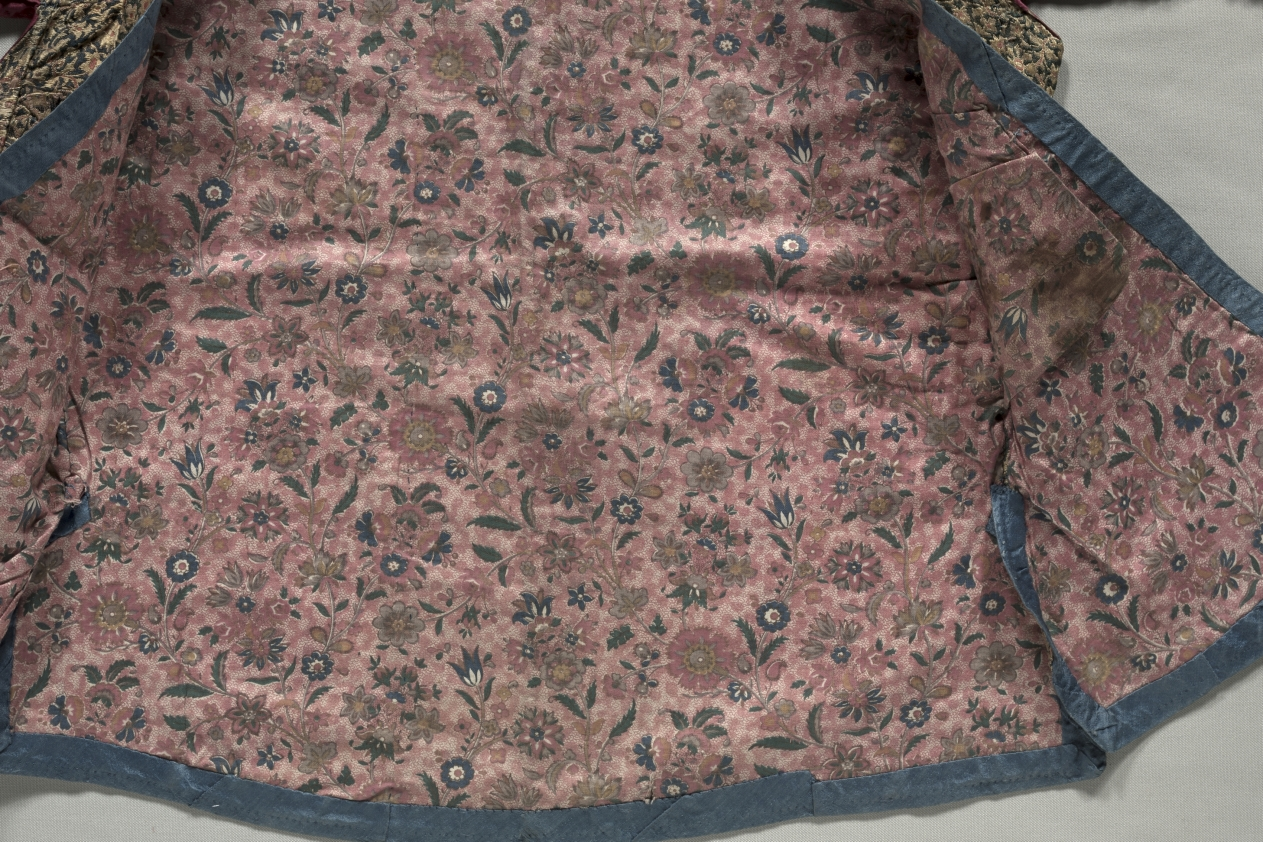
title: Jacket for a Child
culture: Iran, 18th century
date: 1700s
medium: Silk taquete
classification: Garment